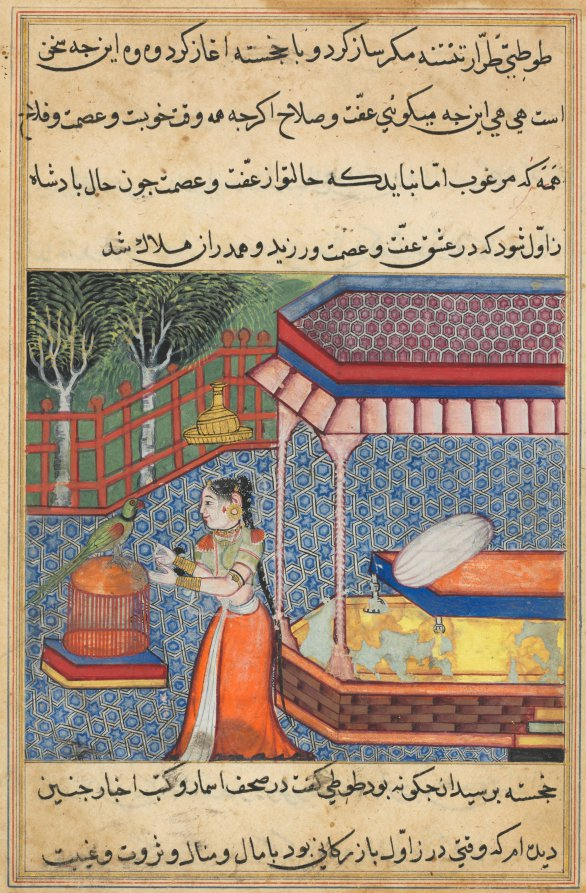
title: The parrot addresses Khujasta at the beginning of the thirty-sixth night, from a Tuti-nama (Tales of a Parrot)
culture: Mughal India, court of Akbar (reigned 1556–1605)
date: c. 1560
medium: gum tempera, ink, and gold on paper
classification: Painting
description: On the thirty-sixty of fifty-two nights, Khujasta stands before Tuti the talking parrot in a brightly patterned courtyard. In order to keep Khujasta from visiting her lover, Tuti begins to tell her the tragic story of the King of Zabul, who fell for a merchant’s daughter and ultimately died as a result of his unrequited love.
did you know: Zabul is a city in southern Afghanistan.